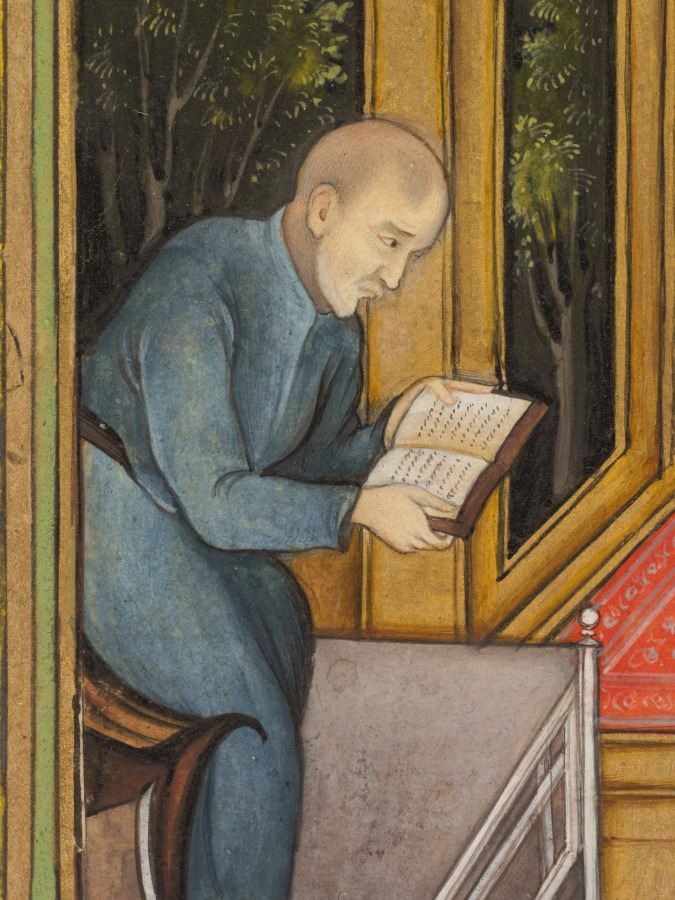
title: Jesus among the doctors in the Temple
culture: India, Lucknow, Mughal, 18th century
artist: Mir Kalan Khan (Indian, c. 1730–1775)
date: c. 1760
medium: Gum tempera and gold on paper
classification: Painting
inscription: Persian inscription on verso: an image of Blessed Miriam, work of Mir Kalan Khan